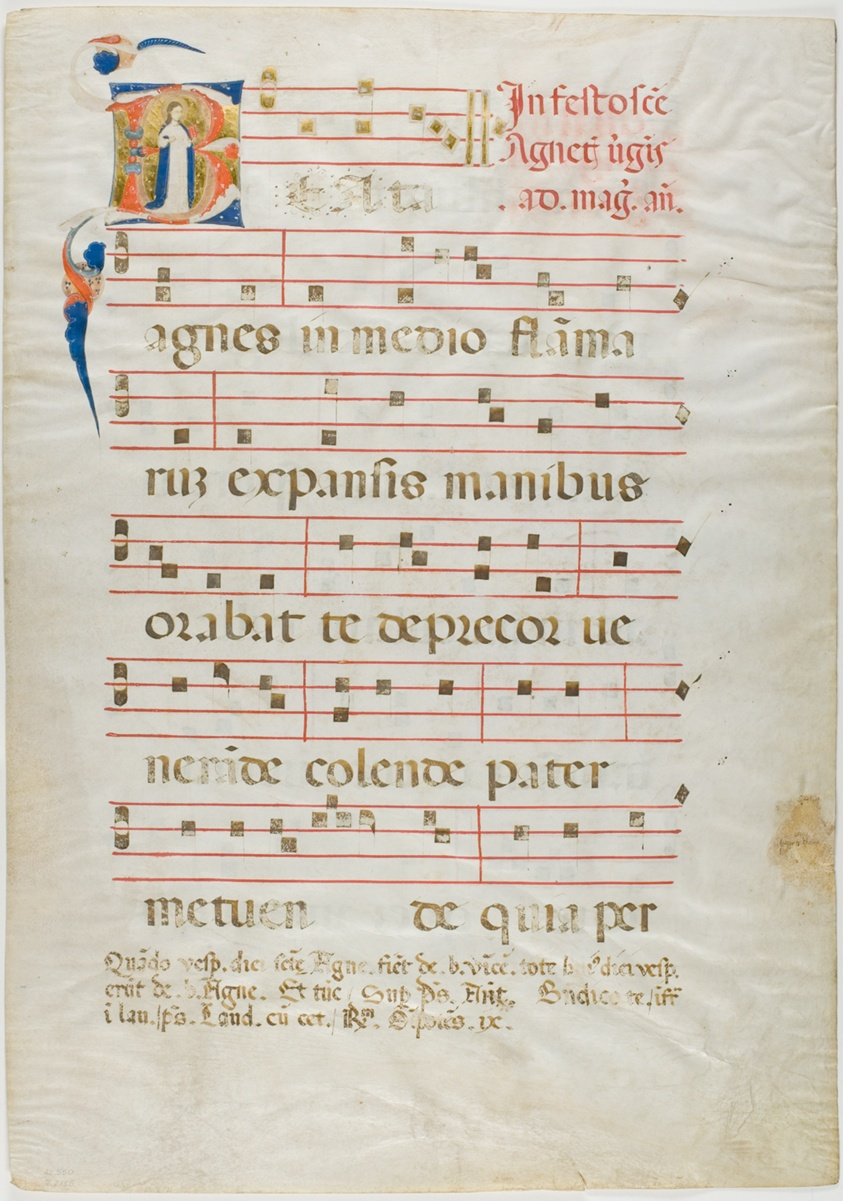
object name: Drawing and Watercolor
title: Saint Agnes in a Historiated Initial "V" from an Antiphonary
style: medieval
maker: Italian (Rimini); Neri da Rimini (Italian, active 1300-1338) or a close assistant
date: 1310/15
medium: Manuscript cutting in tempera and gold leaf, with gothica textualis inscriptions in Latin in black and red ink, ruled in red ink, on parchment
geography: Italy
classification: tempera; manuscript; drawings (visual works); prints and drawing